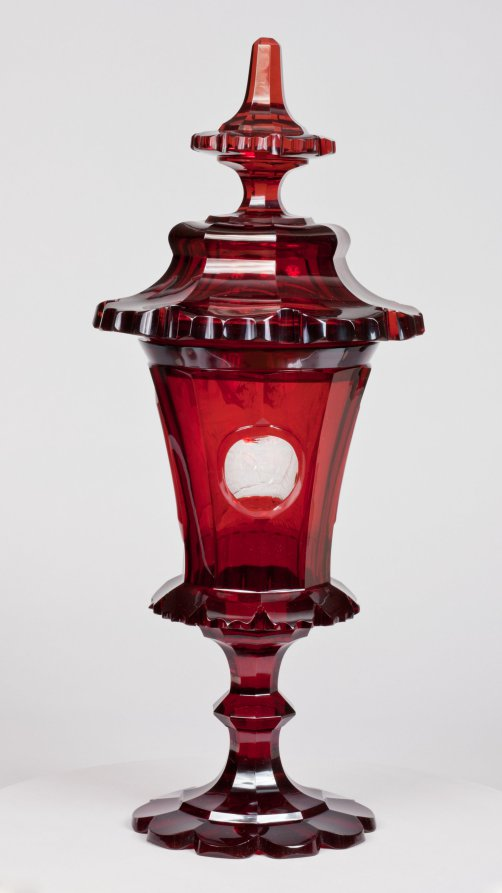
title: Covered Cup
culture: Bohemia, 19th century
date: mid-1800s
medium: ruby glass with engraved decoration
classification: Glass